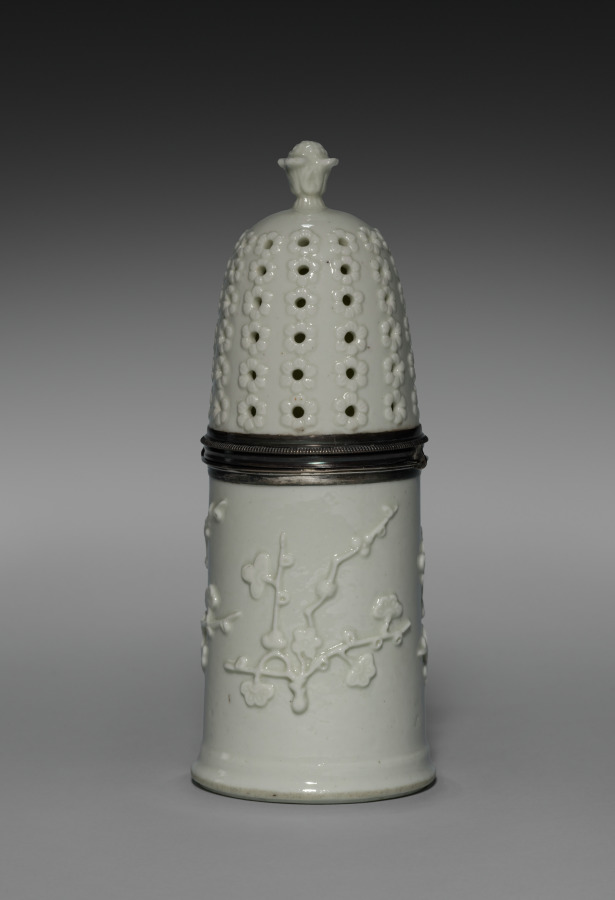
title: Caster (Saupoudreuse)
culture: France, Saint Cloud, 18th century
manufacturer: Saint Cloud Porcelain Factory (French)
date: c. 1732–38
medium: soft-paste porcelain, silver mount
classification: Ceramic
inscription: [Discharge mark of Hubert Louvet, 1732-1738 (Dog's head in profile), on both sections of silver mount]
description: This cylindrical caster with a removable pierced cover may have held sugar. It likely derives its form from silver casters manufactured pre-1700. Its all-white, molded, prunus branch decorations are characteristic of blanc de chine, the term used in France to reference the highly prized porcelain produced in the southeastern Fujian province of Dehua, China, known for its pure color and high degree of translucence.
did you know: Prunus branches, which refer to flowering trees and shrubs including plums, cherries, peaches, nectarines, apricots, and almonds, were a common motif in Chinese porcelain.